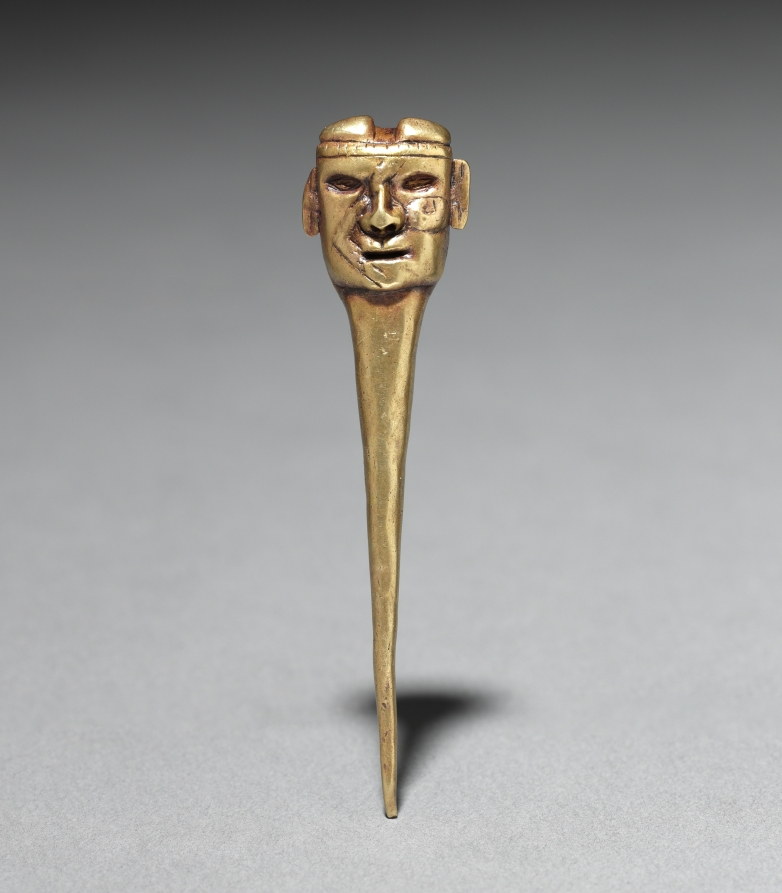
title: Pin Ornament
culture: Peru, North Highlands, Chavín de Huantar(?), Chavín style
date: c. 500–200 BCE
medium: hammered and cut gold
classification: Metalwork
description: There seems to be a link between Chavín religion and appearance of the Andes’ first large precious-metal objects, made using revolutionary new metallurgical processes. Chavín may have developed these technical innovations to express the inexpressible, the "wholly other" nature of its religion. In many areas, elite men and women wore the ornaments as emblems of their ties to this religion, and eventually were buried with them. These 16 objects, along with three others not in the museum’s collection, are said to have come as a group from Chavín itself.